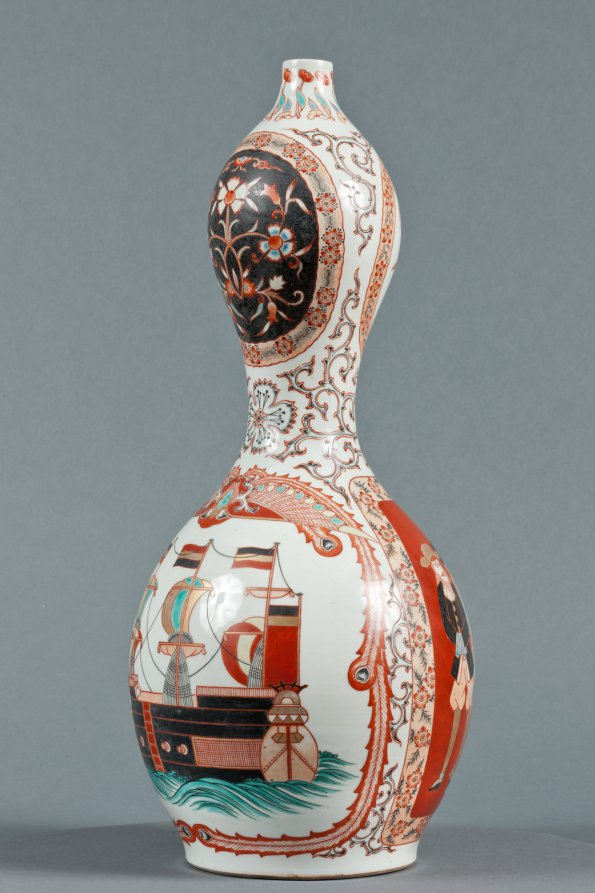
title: Bottle with Western Ships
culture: Japan, Edo period (1615–1868)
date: c. 1800–1868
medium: Porcelain with decoration in colored enamels and underglaze blue, overglaze enamels, and gold (Hizen ware, Arita type)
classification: Ceramic